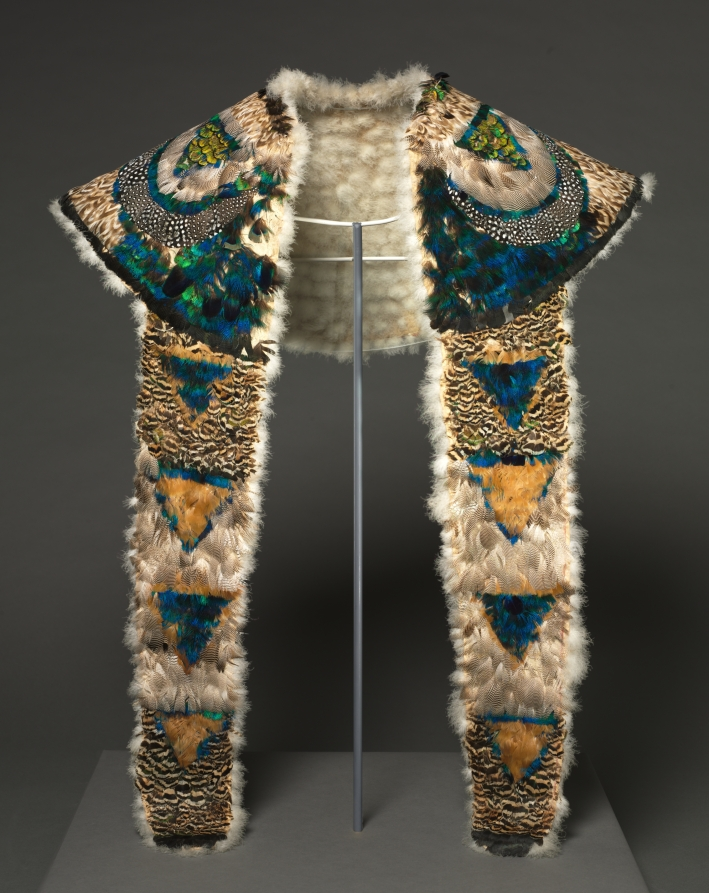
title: Pelerine (Collar or Cape)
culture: Northeastern Woodlands, Great Lakes/St. Lawrence River Region or Europe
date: c. 1830–1860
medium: Cotton, peacock feathers, guinea fowl feathers?, Gadwalls duck feathers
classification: Textile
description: Experts argue about collars of this type: Did a Great Lakes native artist make it, using as a model an English lady’s pelerine and exotic feathers obtained through trade? Or was the collar created by a European feather worker, perhaps after seeing the spectacular feather capes of native Hawaiian royals who visited England in 1824? There are arguments for both views—and for further research.